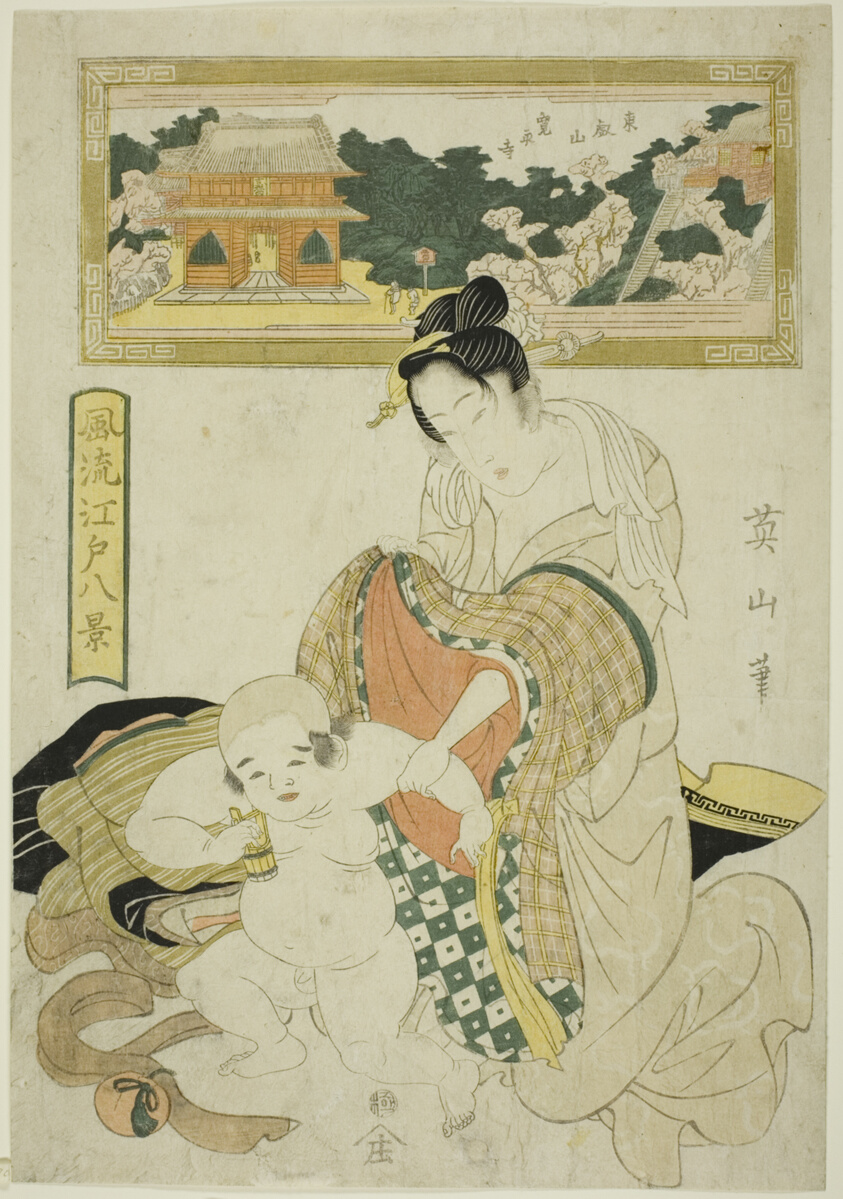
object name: Print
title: Kan'eiji Temple on Toeizan, from the series "Fashionable Eight Views of Edo (Furyu Edo hakkei)"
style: Japanese (culture or style)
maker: Kikukawa Eizan (Japanese, 1787-1867)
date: early 19th century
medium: Color woodblock print; oban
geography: Japan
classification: woodblock print; print; asian art